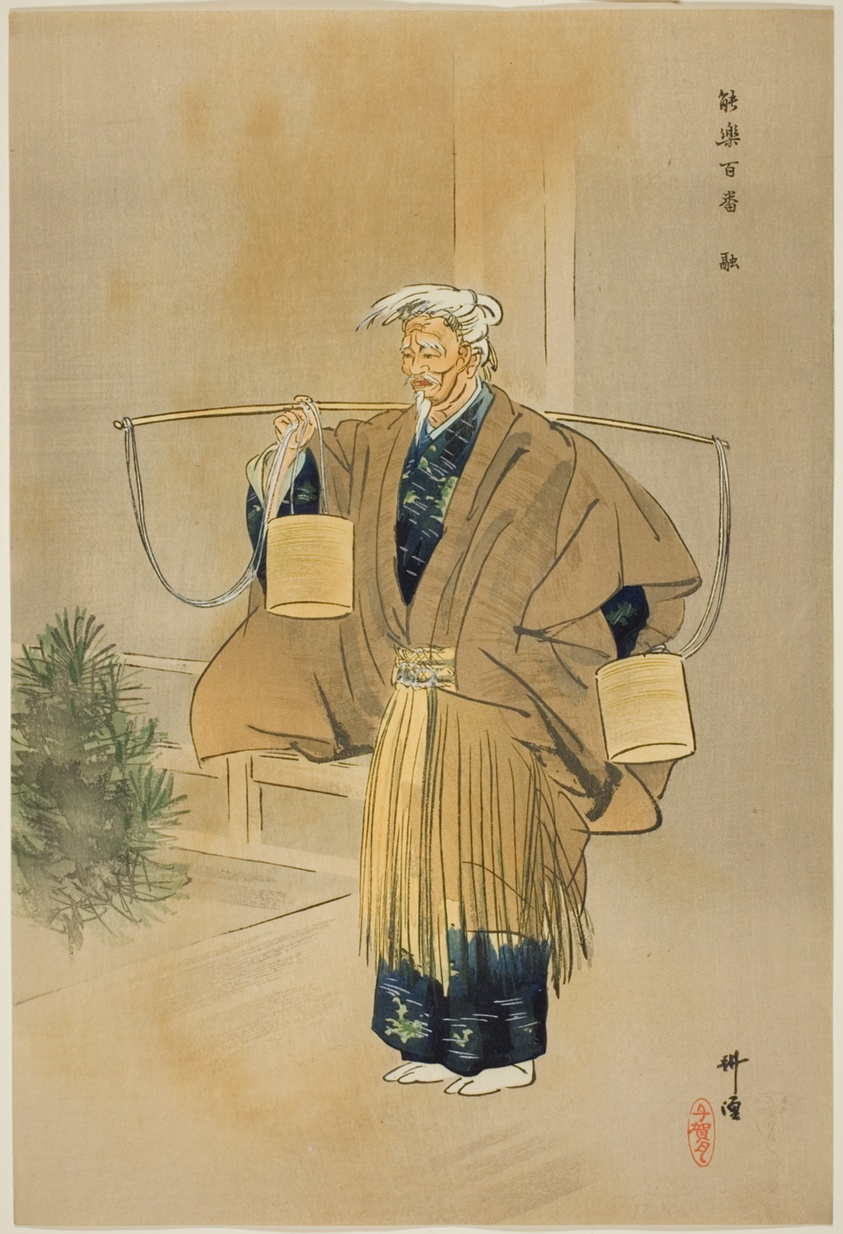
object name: Print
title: Toru, from the series "One Hundred No Dramas (Nogaku hyakuban)"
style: Japanese (culture or style)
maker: Tsukioka Kogyo; Japanese, 1869-1927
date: 1898/1903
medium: Color woodblock print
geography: Japan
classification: woodblock print; print; asian art